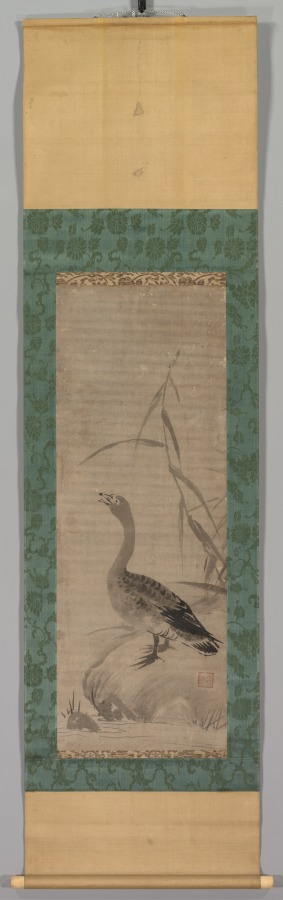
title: Goose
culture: Japan, Edo period (1615–1868)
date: c. 1615–99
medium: hanging scroll; ink on paper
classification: Painting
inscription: spurious seal of Sesshu, lower right.